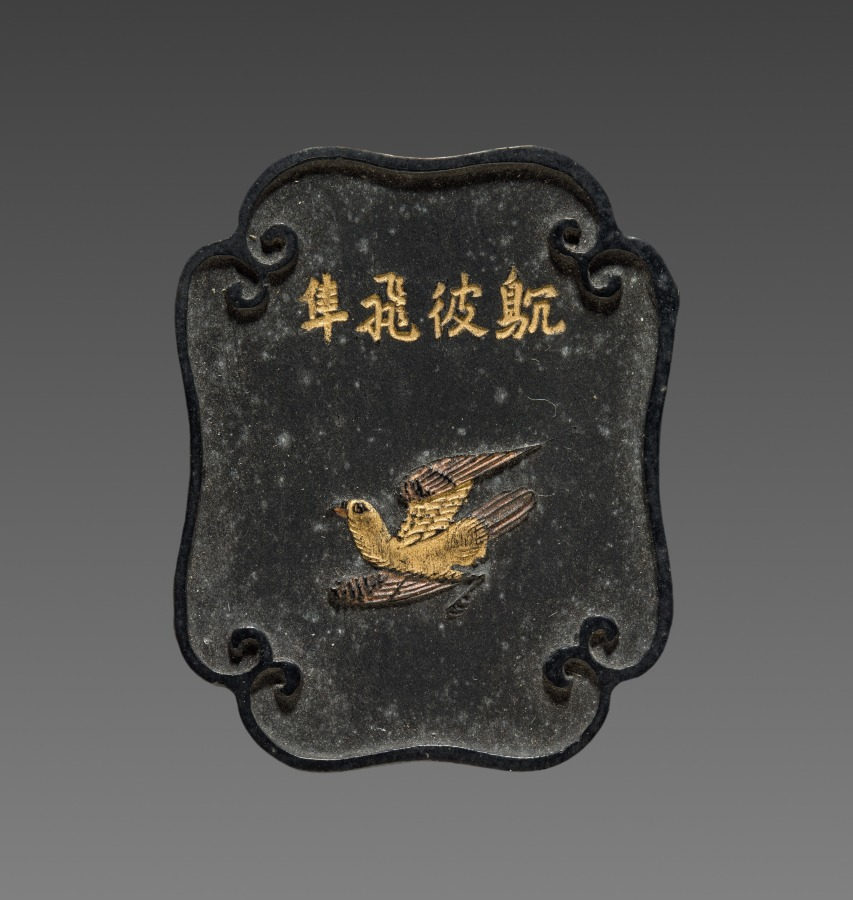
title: Ink Cake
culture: China, Qing dynasty (1644-1911)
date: 19th Century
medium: ink cake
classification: Miscellaneous